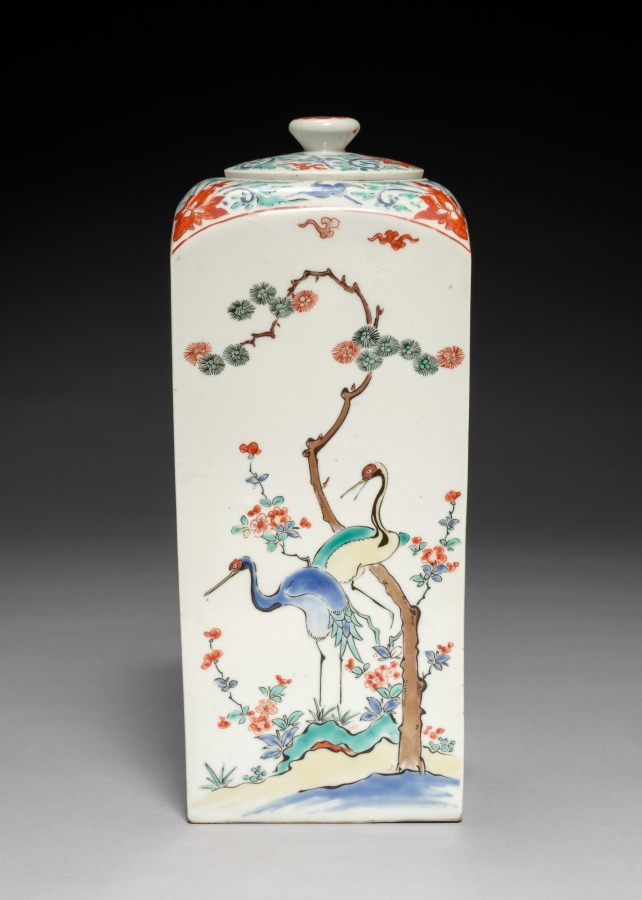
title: Square Jar with Birds and Flowers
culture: Japan, Edo period (1615–1868)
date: late 1600s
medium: Porcelain with overglaze color enamels and gold (Hizen ware, Kakiemon type)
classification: Ceramic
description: This lidded square jar was likely paired with a complementary yet nonidentical mate. The pine tree, plum, and bamboo together form the frequently depicted motif known as the Three Friends of Winter (shōchikubai), so named because of their hardy perseverance in the cold. Each side also features a pair of birds, including cranes on one face and pheasants on another.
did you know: A jar like this was fired at a high temperature, painted with colored enamels, and then fired again at a lower temperature.